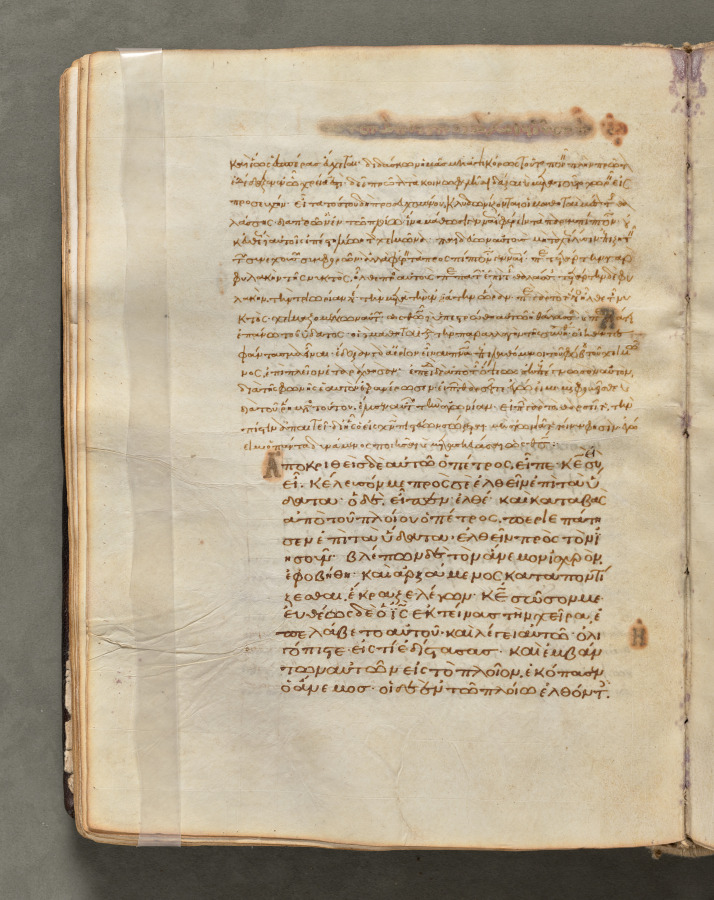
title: Text, folio 66 (verso), from a Gospel Book with Commentaries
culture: Byzantium, Constantinople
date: c. 1000–1100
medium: ink, tempera, and gold on vellum; leather binding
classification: Bound Volume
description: Each of the four gospels in this book opens on a page with brilliantly illuminated borders depicting the author of the text as well as birds-principally peacocks, symbols of the immortality of the soul-and fountains, representing the fountain of life and the salvation of the soul. This volume consists of 428 leaves with texts in Greek. Its level of sophistication suggests that it was probably written and decorated in a monastery in Constantinople.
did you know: Gospel Books were carried in procession through Byzantine churches.